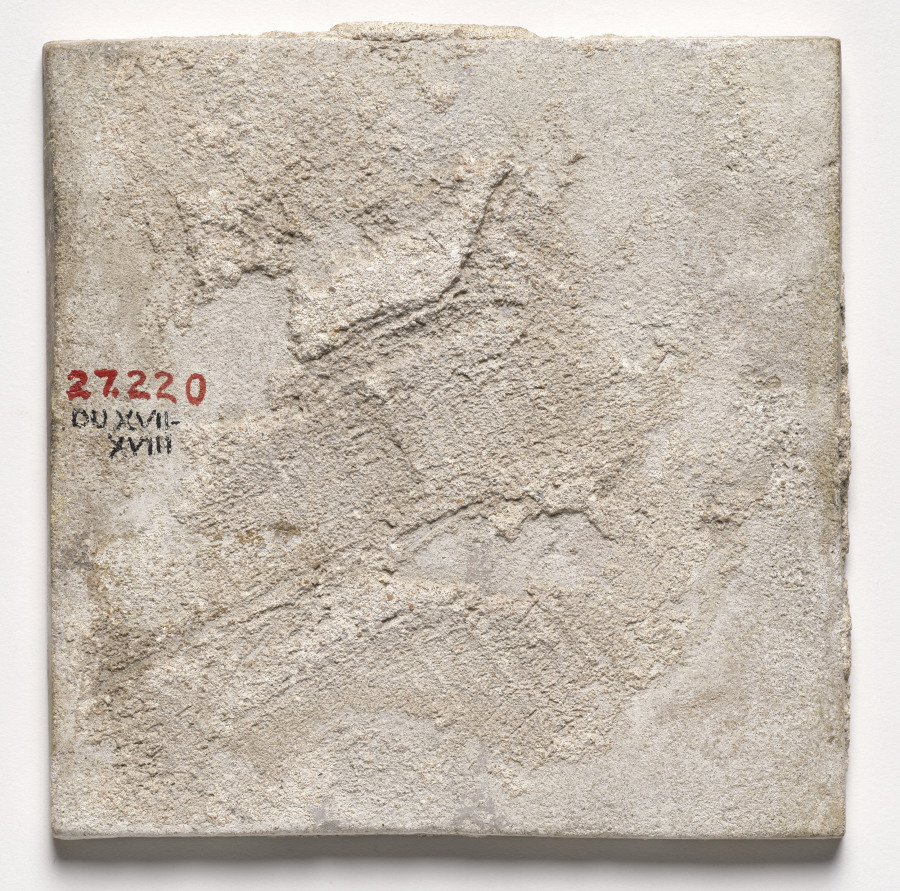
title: Tile- Old Testament Scene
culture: Netherlands, Holland, Delft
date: c 1600s- 1700s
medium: glazed ceramic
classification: Ceramic